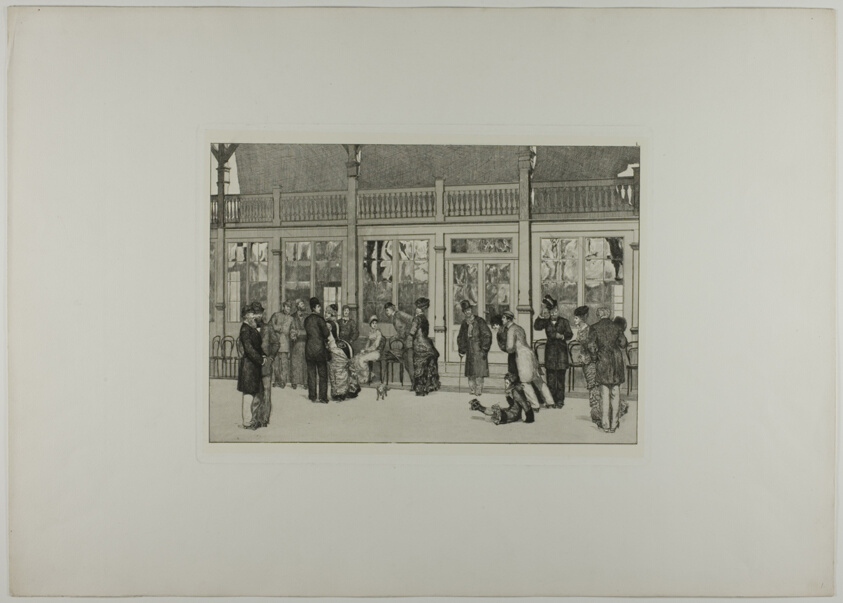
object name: Print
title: Place, plate one from A Glove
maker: Max Klinger (German, 1857-1920)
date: 1881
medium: Ivory chine collé on off-white wove paper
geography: Germany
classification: etching; print; prints and drawing